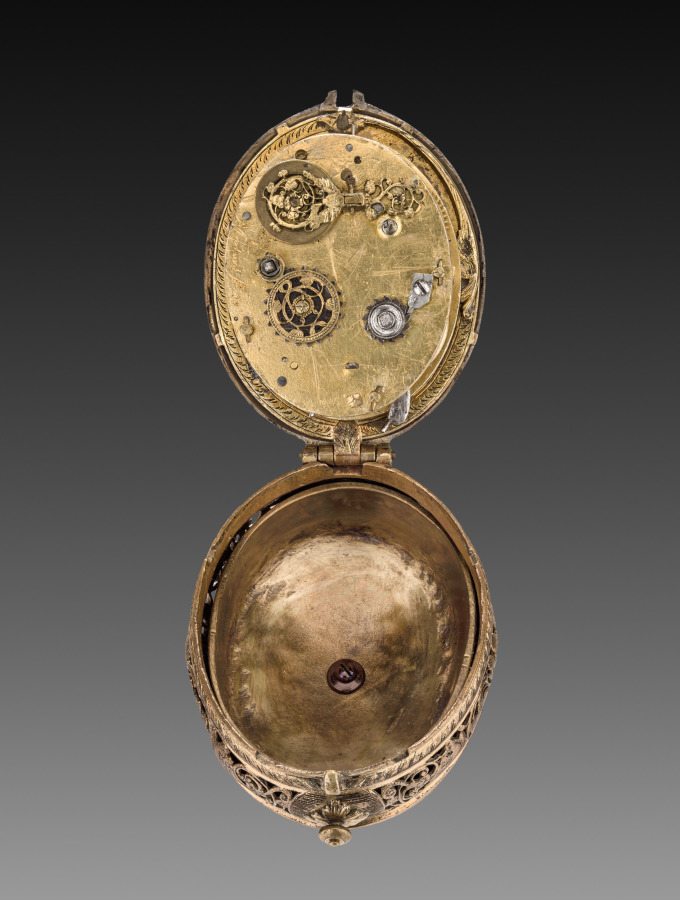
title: Engraved Egg Watch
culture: France, 16th century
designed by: Denis Martinot (French)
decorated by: attributed to Theodor de Bry (Flemish, 1528–1598)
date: 1590–1600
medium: silver, steel, and rock crystal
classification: Jewelry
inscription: inscribed: D. Martinot, Paris.